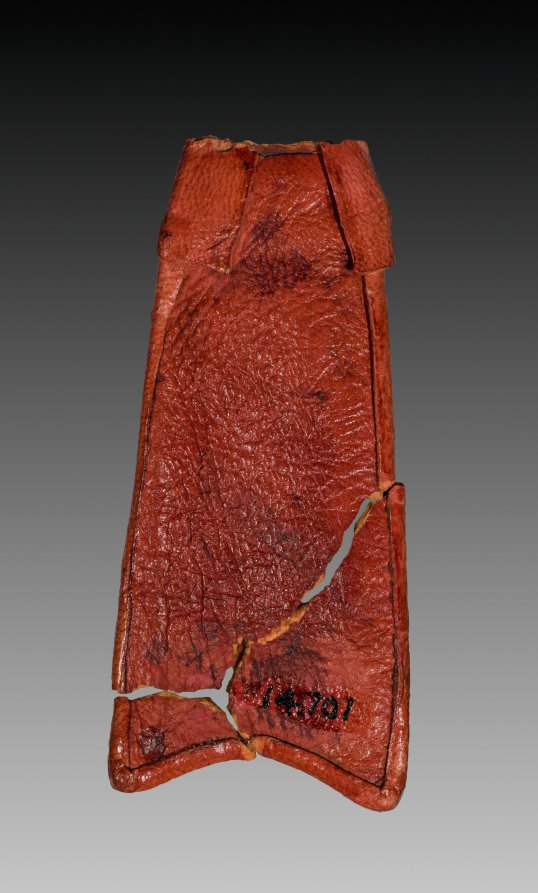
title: Tab from Mummy Band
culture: Egypt, Third Intermediate (1069–715 BCE), Dynasty 22, reign of Osorkon I (992–887 BCE)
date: 945–715 BCE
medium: stained leather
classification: Funerary Equipment